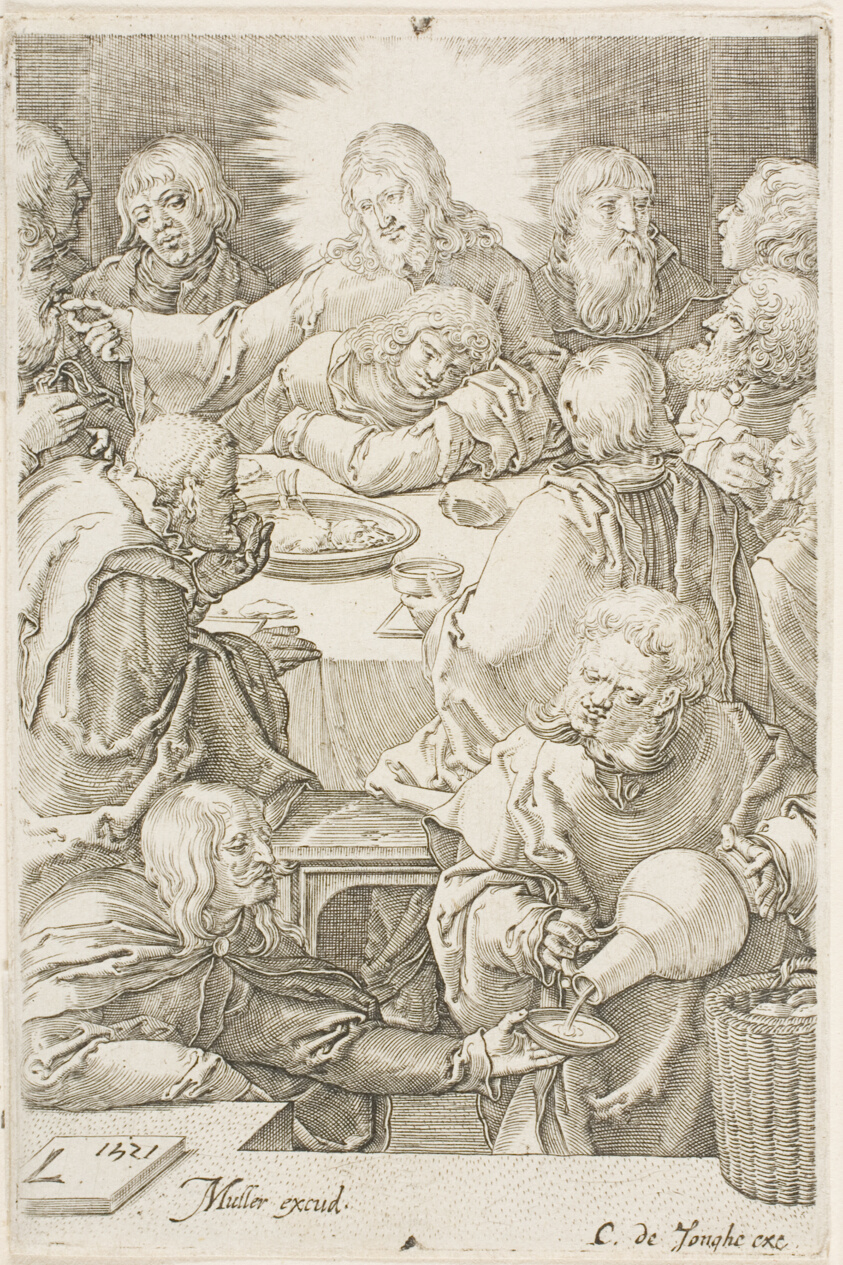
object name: Print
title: The Last Supper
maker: Jan Harmensz Muller (Dutch, 1571-1628); after Lucas van Leyden (Netherlandish, c. 1494-1533)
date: 1615/1620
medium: Engraving in black on ivory laid paper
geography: Holland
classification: engraving; print; prints and drawing